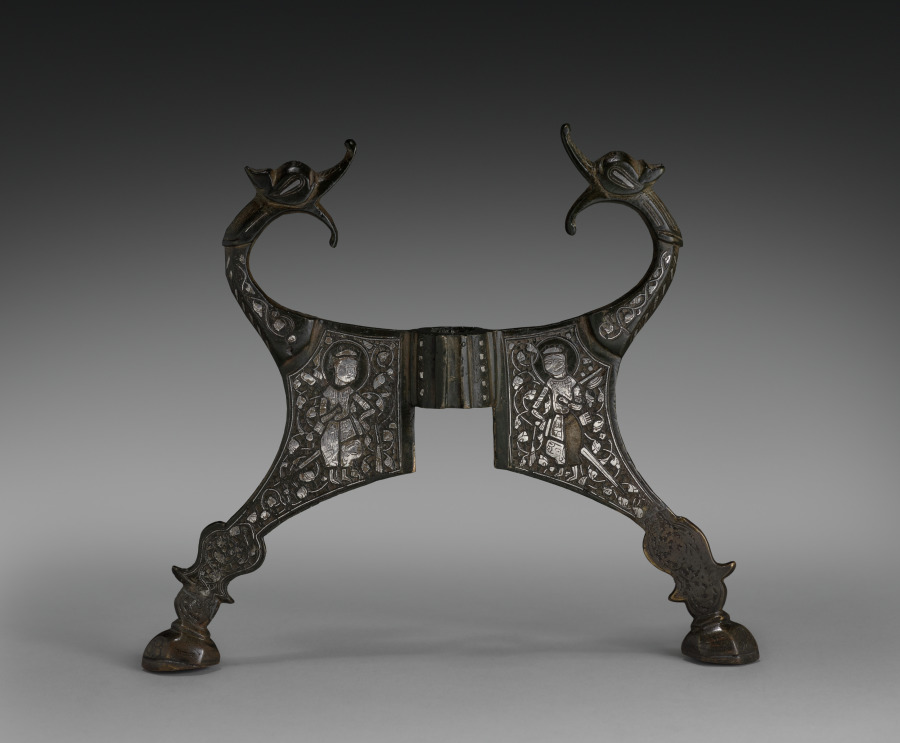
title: Dragon-headed Stand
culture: Northern Iraq or Syria, Zangid (1127–1251) or Ayyubid period (1171–1260)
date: 1200s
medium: Cast brass inlaid with silver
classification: Metalwork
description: Themes of hunting and combat are evoked by this stand with gaping dragon heads and figures armed with swords and spears.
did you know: Each hunter's head is surrounded by a nimbus.